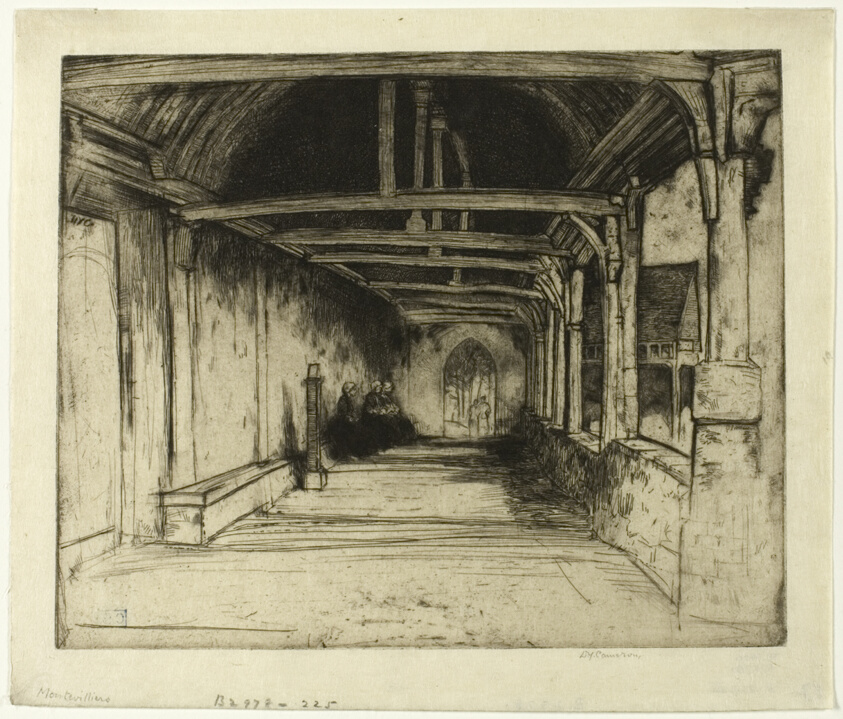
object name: Print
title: Montivilliers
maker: David Young Cameron (Scottish, 1865-1945)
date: 1903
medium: Etching and drypoint on ivory Japanese paper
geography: Scotland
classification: etching; print; prints and drawing